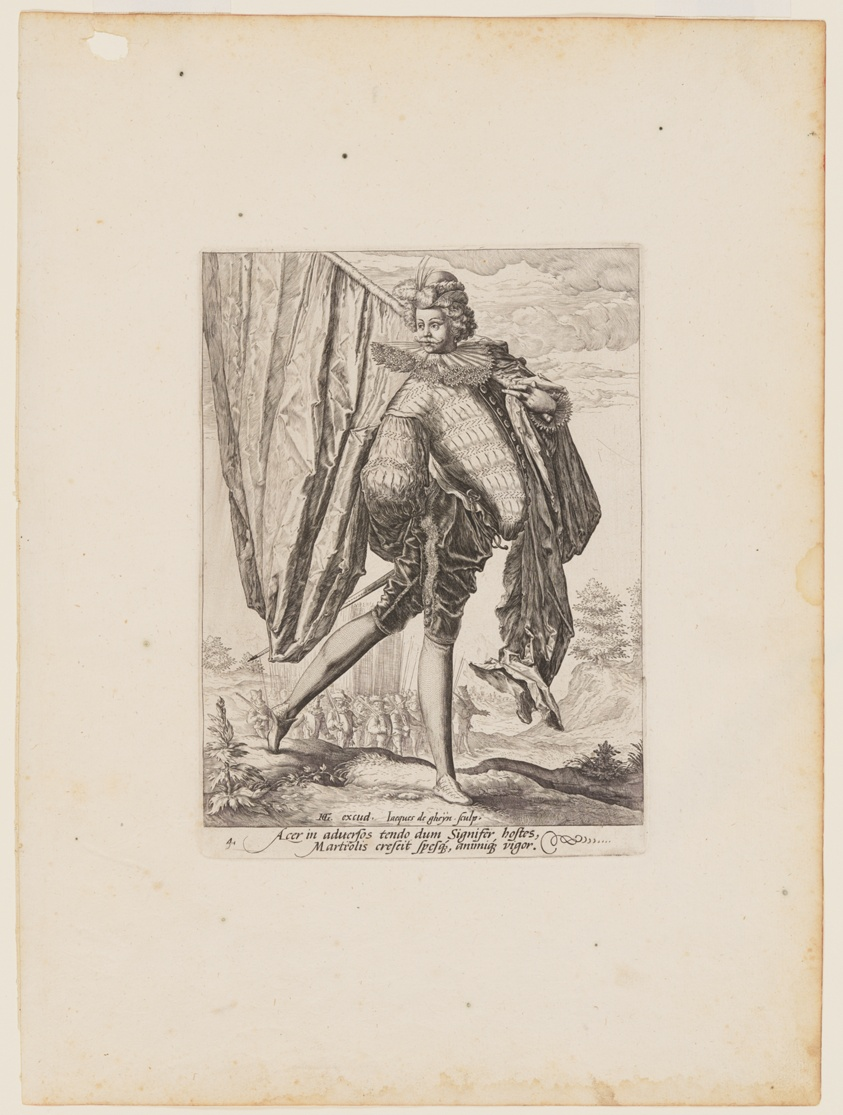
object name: Print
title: Standard Bearer, from Officers and Soldiers of the Bodyguard of Emperor Rudolph II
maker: Jacques de Gheyn II (Dutch, 1565–1629); after Hendrick Goltzius (Dutch, 1558–1617)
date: 1587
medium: Engraving on ivory laid paper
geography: Netherlands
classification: engraving; paper; print; prints and drawing